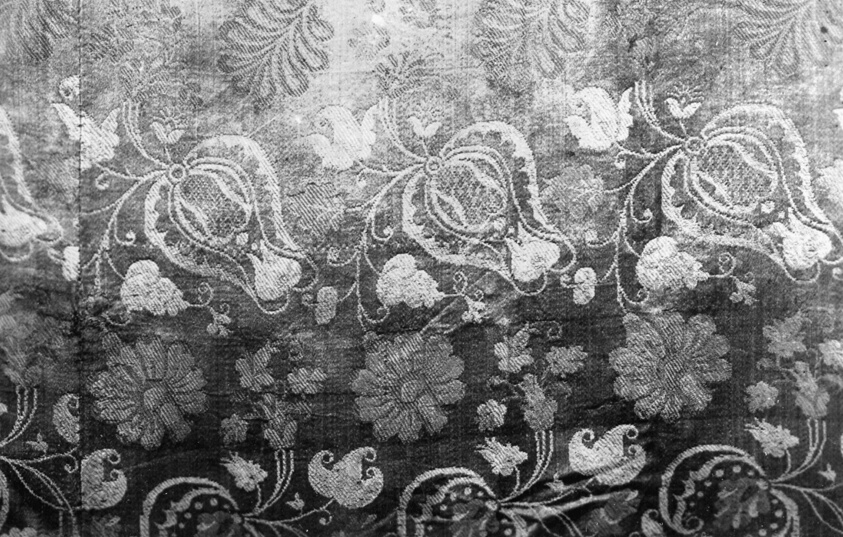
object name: Textile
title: Fragment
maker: France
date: 1875/1900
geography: France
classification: textile; weaving